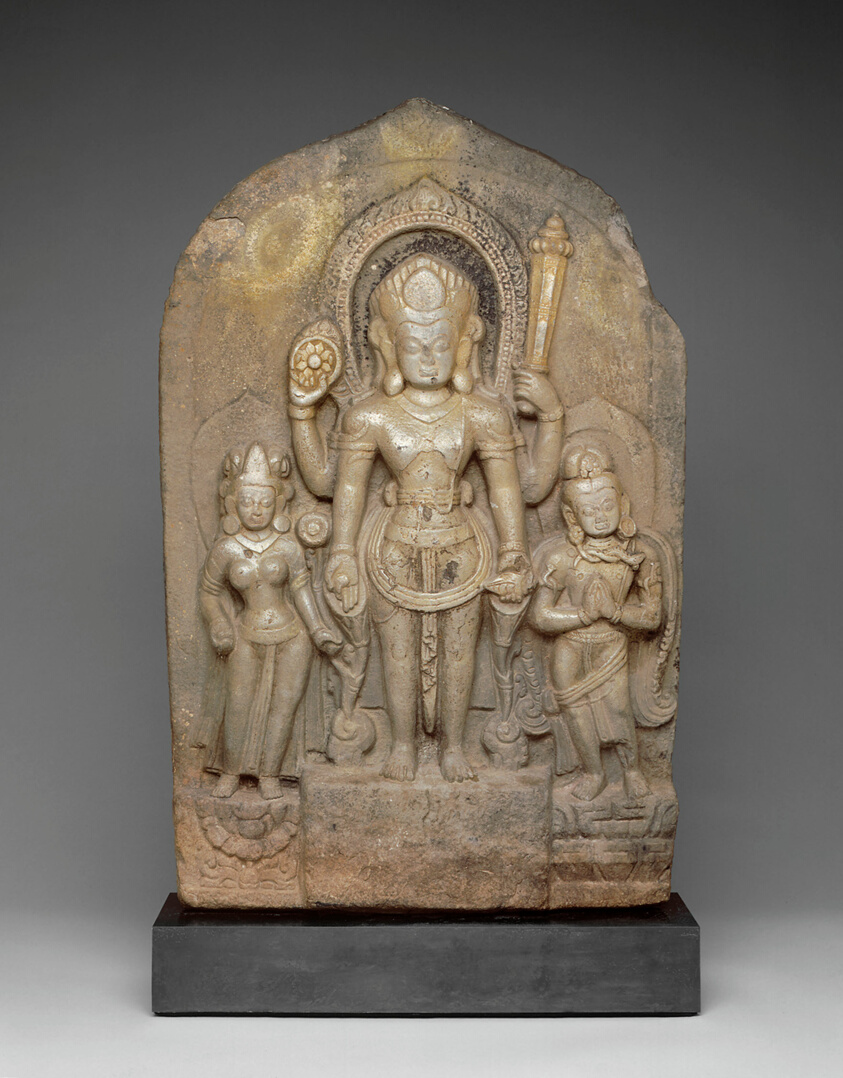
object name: Sculpture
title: God Vishnu with Goddess Lakshmi and His Mount, Garuda, in Attendance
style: Himalayan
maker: Nepal; Kathmandu Valley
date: 11th century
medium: Schist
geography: Kathmandu Valley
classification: sculpture; schist; stone; asian art